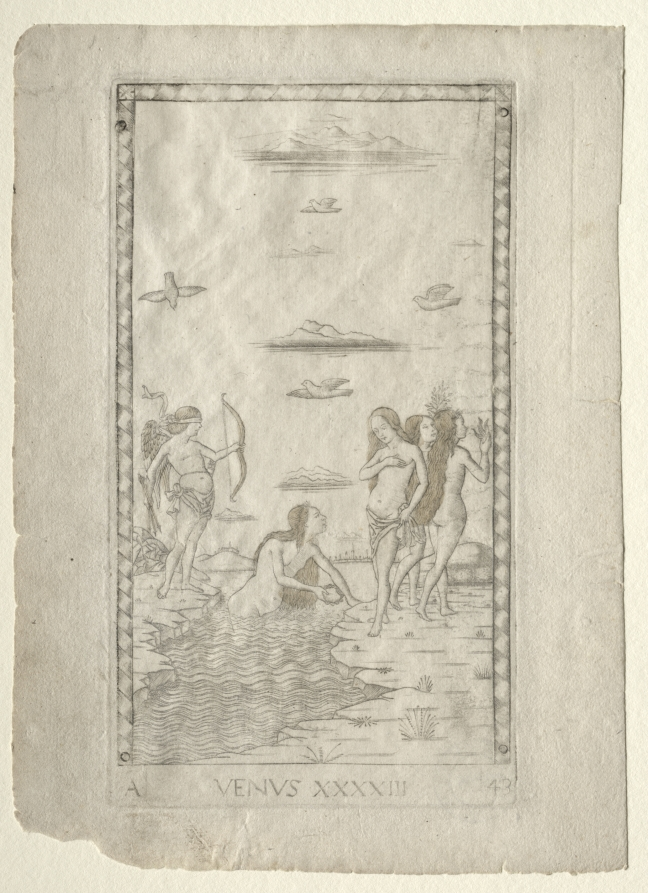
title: Venus (from the Tarocchi, series A: Firmaments of the Universe, #43)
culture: Italy, Ferrara, 15th century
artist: Master of the E-Series Tarocchi (Italian, active 1460s)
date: before 1467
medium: engraving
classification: Print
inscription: Lettered below the image of Venus: ·A· / ·VENUS·XXXXIII· / ·43·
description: This engraving is part of the Tarocchi group marked with the letter “A”, and named Firmaments of the Universe. This series comprises the seven planets from the classical astronomy (Moon, Mercury, Venus, Sun, Mars, Jupiter, Saturn) and the three celestial spheres that separate them from the Supreme Entity (Prima Causa) from which everything was originated. Here, Venus is personified as a nude female figure, in profile, bathing in a small river, and holding a sea shell in her right hand. Doves are flying above her. Venus’s winged son Cupid stands behind her, blindfolded and carrying his bow and arrows. On the other side of the river bank are three naked young girls, symbolizing the three Graces. Venus was believed to be the Goddess of Love, the daughter of Jupiter, and the third in the order of planets.